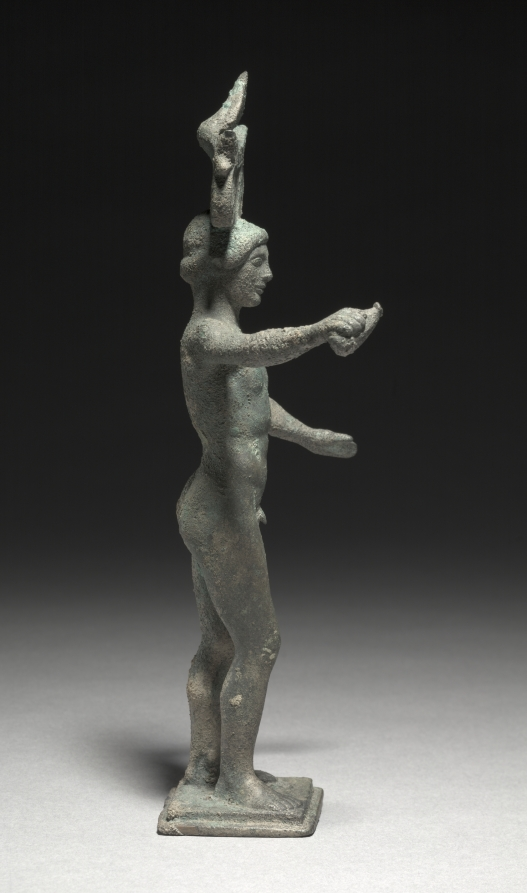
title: Mirror Support: Athlete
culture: South Italy, Locri (?), Greek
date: 460–450 BCE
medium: bronze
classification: Sculpture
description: A muscular nude youth strides forward on a square metal plate with his arms outstretched. The plate and the volute decoration that adorns his head suggest that this statuette was the support for a mirror. The youth is likely an athlete, as he holds an alabastron or oil vessel in his right hand. The oil may be an offering to the gods for victory, or to rub onto the skin to protect and beautify his body before an athletic contest. The mirror was made separately and would have been attached to the triangular tang above the athlete’s head.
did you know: Most Greek mirror stands depict female figures, but this one depicts a male.